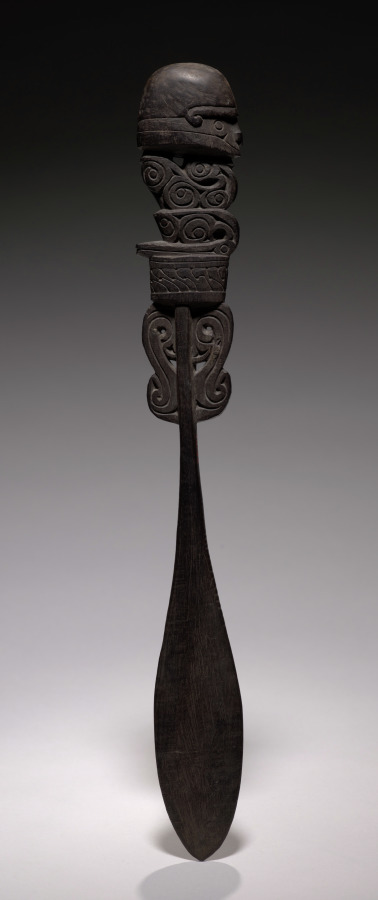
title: Lime Spatula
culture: Melanesia, New Guinea, Massim Area, Trobriand Islands, 20th century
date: before 1930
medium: wood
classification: Sculpture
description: Intricately carved spatulas (chunum) were used to remove a mixture of areca nut, lime, and betel pepper from gourd containers for chewing. The stylized human face and figure are decorated with lime-filled incised designs.